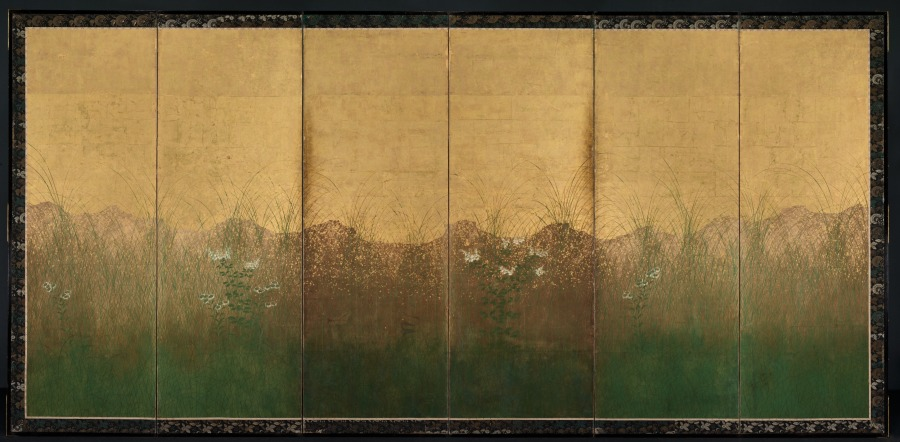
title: Autumn Evening with Full Moon on Musashino Plain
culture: Japan, Edo period (1615–1868)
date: early 1600s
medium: Pair of six-fold screens; ink, color, and gold and silver foil on gilded paper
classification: Painting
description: Tall grasses and autumn flowers reach out of thick green undergrowth in this depiction of the plain of Musashi, a site famous from classical Japanese poetry. A silver disc, now tarnished, represents the full moon. Flecks of cut-gold foil in the sky evoke the day’s passage into night. Once a wilderness with a vast horizon, Musashi is now densely populated.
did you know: The Musashino Plain is home to much of western Tokyo today.